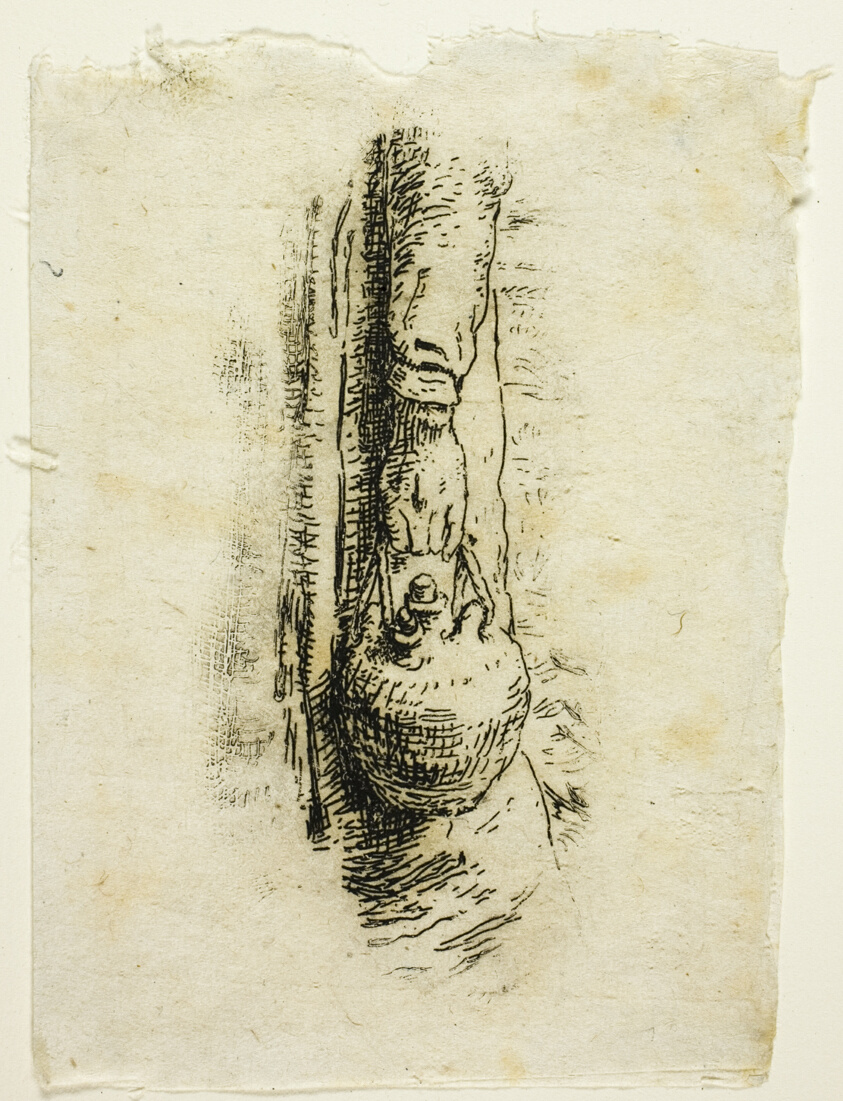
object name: Print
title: Peasants Going to Work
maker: Jean François Millet (French, 1814-1875)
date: 1863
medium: Etching from a portion of the plate on ivory laid chine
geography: France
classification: etching; print; prints and drawing